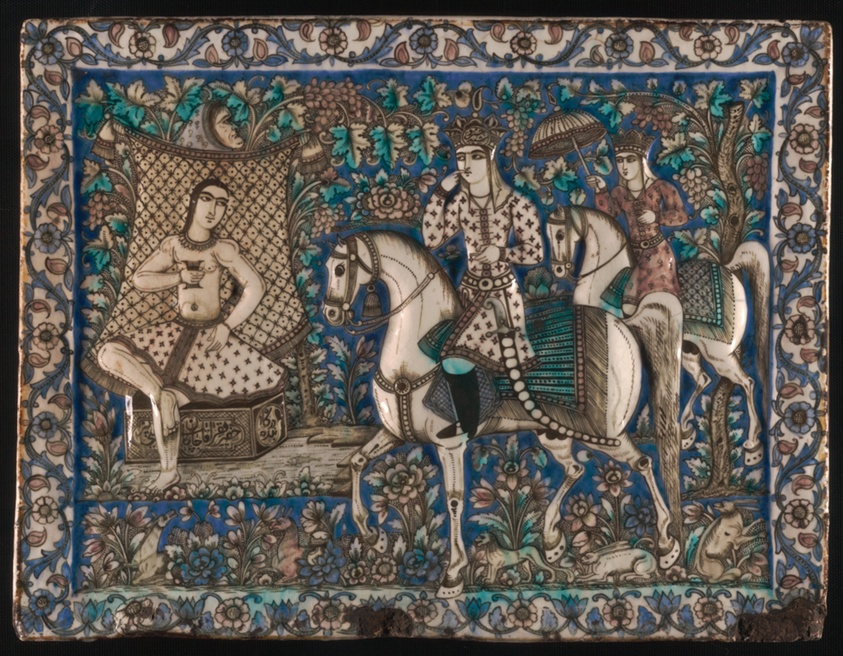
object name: Decorative Arts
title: Tile depicting Khusrau Happening upon Shirin Bathing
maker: Iran; Probably Tehran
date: Qajar dynasty (1789-1925), late 19th century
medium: Fritware with molded decoration and underglaze painting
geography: Iran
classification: earthenware; ceramics; asian art; decorative arts